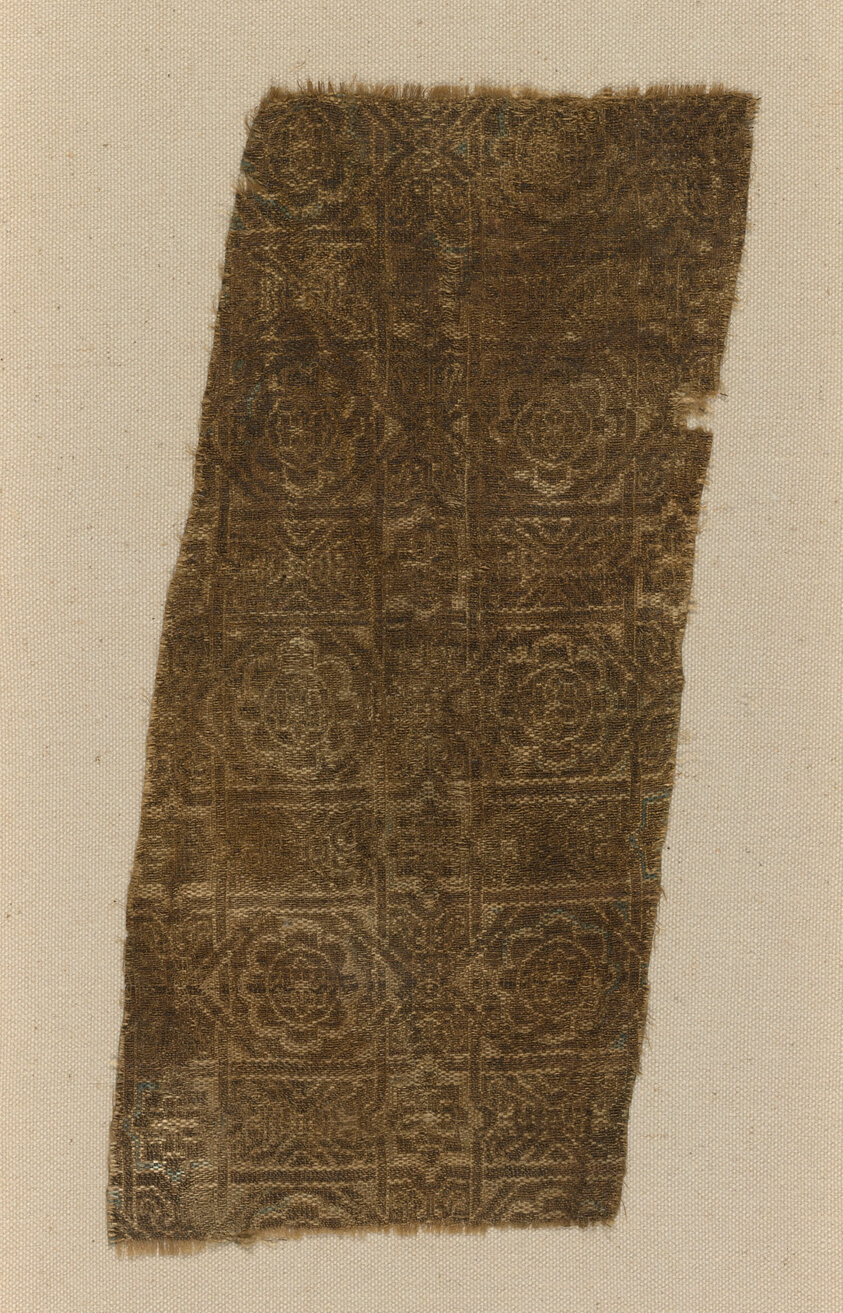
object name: Textile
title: Fragment from the Mantle of Don Felipe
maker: Spain (Villalcázar de Sirga)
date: 1275/1300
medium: Silk and gilt-animal-substrate-wrapped silk, three-color complementary weft plain weave with inner warps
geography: Spain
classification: textile; weaving